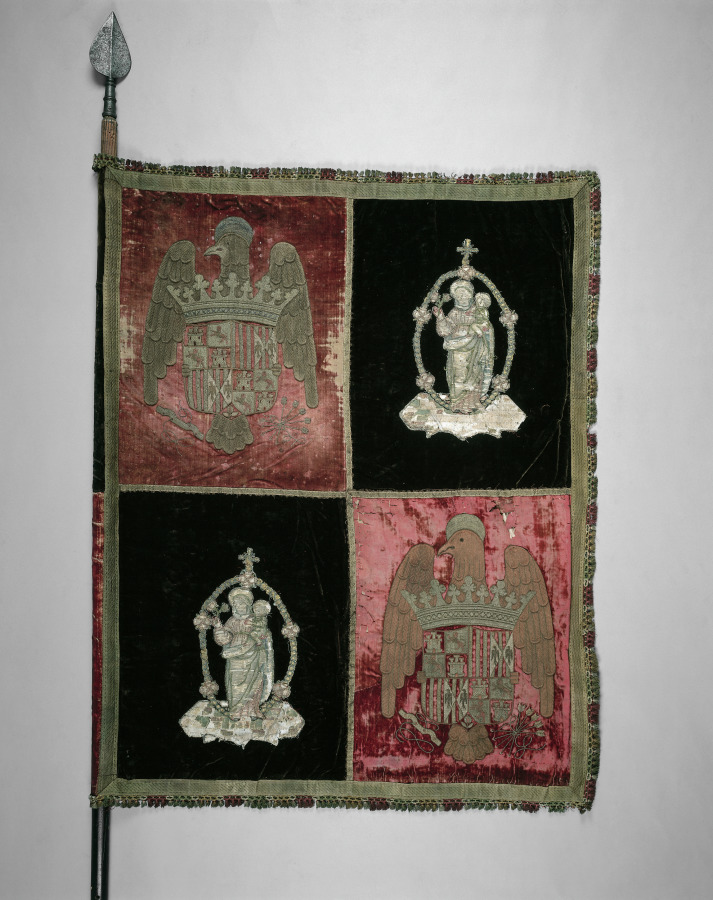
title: Banner with a Quartered Royal Arms of Spain and the Madonna and Child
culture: Spain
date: 1500s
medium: red and dark brown velvet, embroidered; fringe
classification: Velvet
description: This banner is quartered or broken into four parts. Two sections contain embroidered images of the Virgin and Child. The other two are devoted to the royal arms of Spain. On the arms are representations of the kingdoms of Spain in the 1500s. A three towered-castle represents the Kingdom of Castille; the rearing lion is a symbol for the Kingdom of León; two eagles stand for the Kingdom of Sicily; and at the bottom is the pomegranate for Granada. Below this appear a yoke and a bundle of arrows which have been seen on Spain's coat of arms since the union of Ferdinand II of Aragon and Isabella I of Castile.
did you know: This banner was hanging in the armor court when it first opened in 1916.